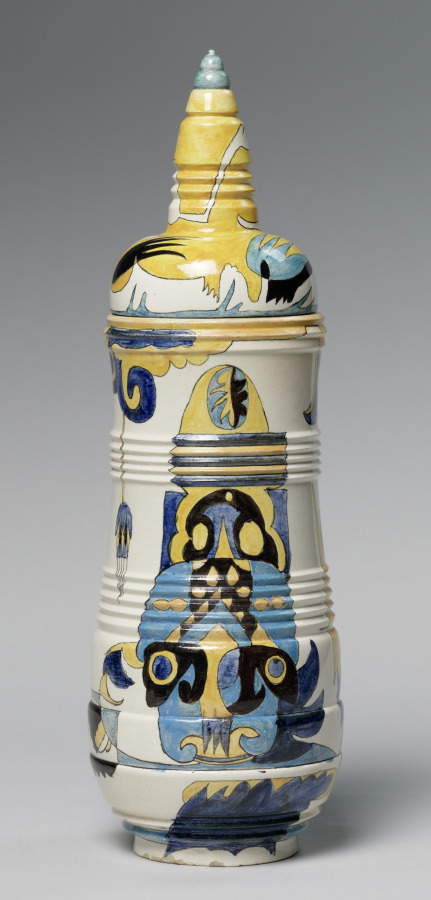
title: Covered Jar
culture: Netherlands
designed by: Theodorus A. C. Colenbrander (Dutch, 1841–1930)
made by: Rozenburg Factory (Netherlandish)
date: 1885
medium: earthenware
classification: Ceramic